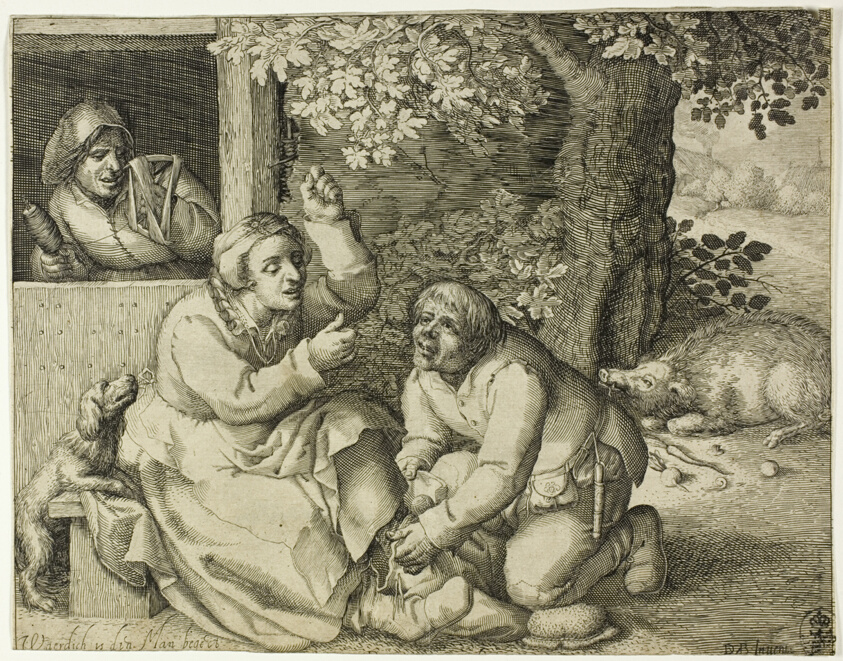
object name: Print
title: Allegory of Marital Strife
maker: Pieter Serwouters (Flemish, 1586-1657); after David Vinckboons I (Flemish, 1576-1632)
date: 1607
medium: Etching on cream laid paper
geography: Flanders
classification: etching; print; prints and drawing